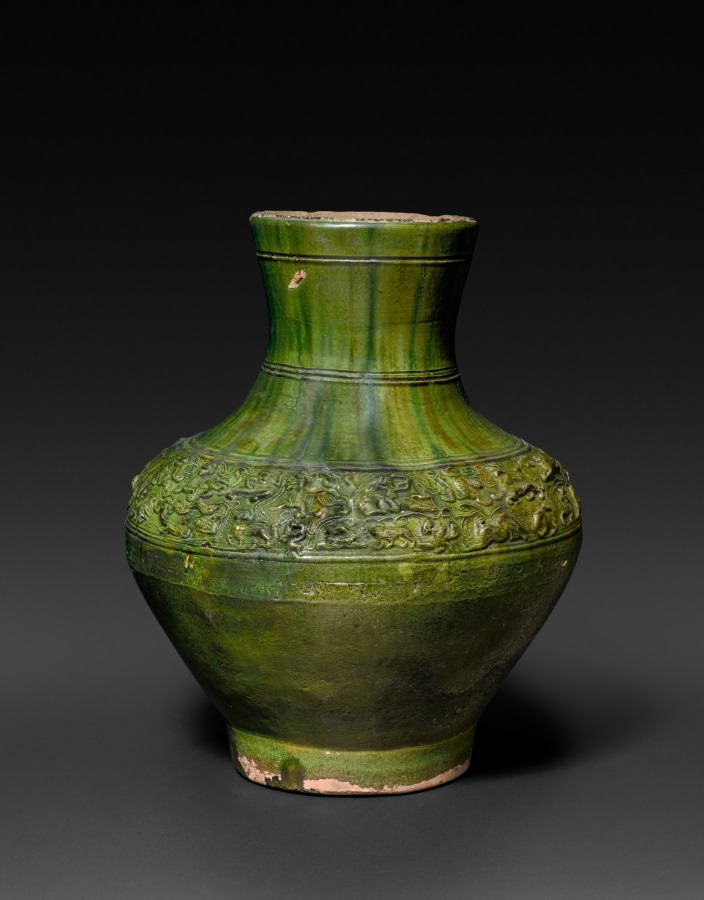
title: Large Jar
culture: China, Han dynasty (202 BCE–220 CE)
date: 206 BCE–220 CE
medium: earthenware with impressed and molded decoration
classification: Ceramic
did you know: The vase's earthenware body is covered with a cucumber-rind green glaze.